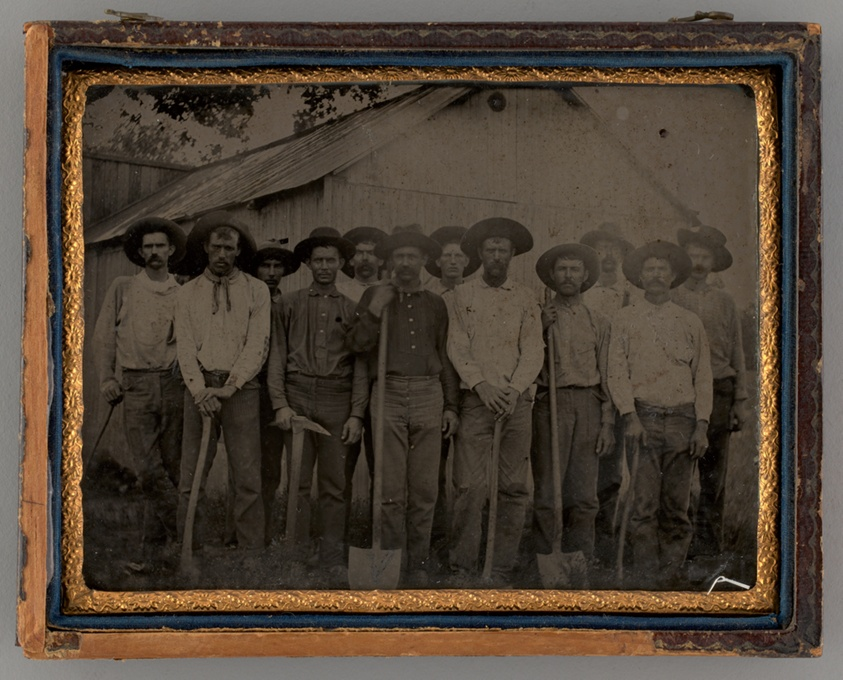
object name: Photograph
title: Untitled (Group Portrait of Miners)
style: 19th century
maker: Unknown maker; American, 19th century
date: 1870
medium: Tintype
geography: United States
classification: portrait; photography; photograph; tintype; portrait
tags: lundberg collection, portraits: multiple subjects, portraits: male subject, portraits, portrait, mines, men, Male, gold rush, gold mining